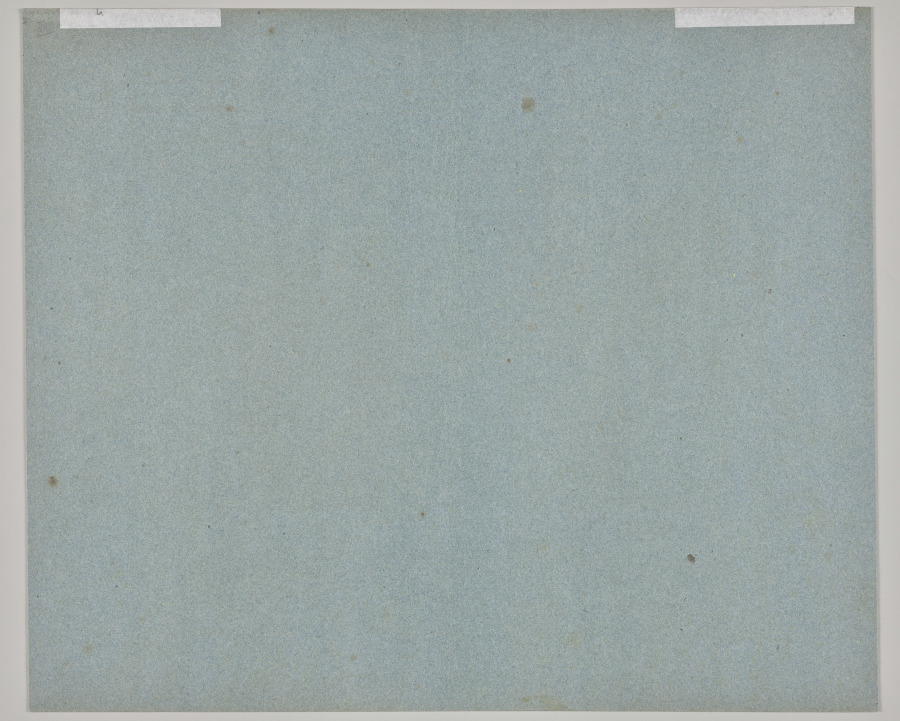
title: Sunday. Church entrance in Berchtesgaden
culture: Germany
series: Seven Areas from Salzburg and Berchtesgaden. Arranged according to the seven days of the week, connected by two allegorical sheets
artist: Ferdinand Olivier (German, 1785–1841)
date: 1818–23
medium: lithograph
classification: Print